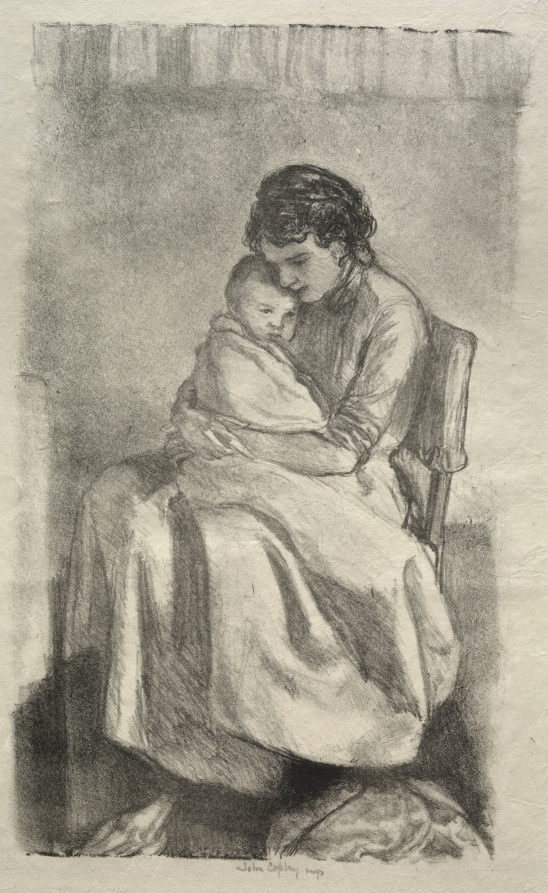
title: Study No. 15: Vespers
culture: England, 20th century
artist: John Copley (British, 1875–1950)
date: 1916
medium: lithograph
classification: Print